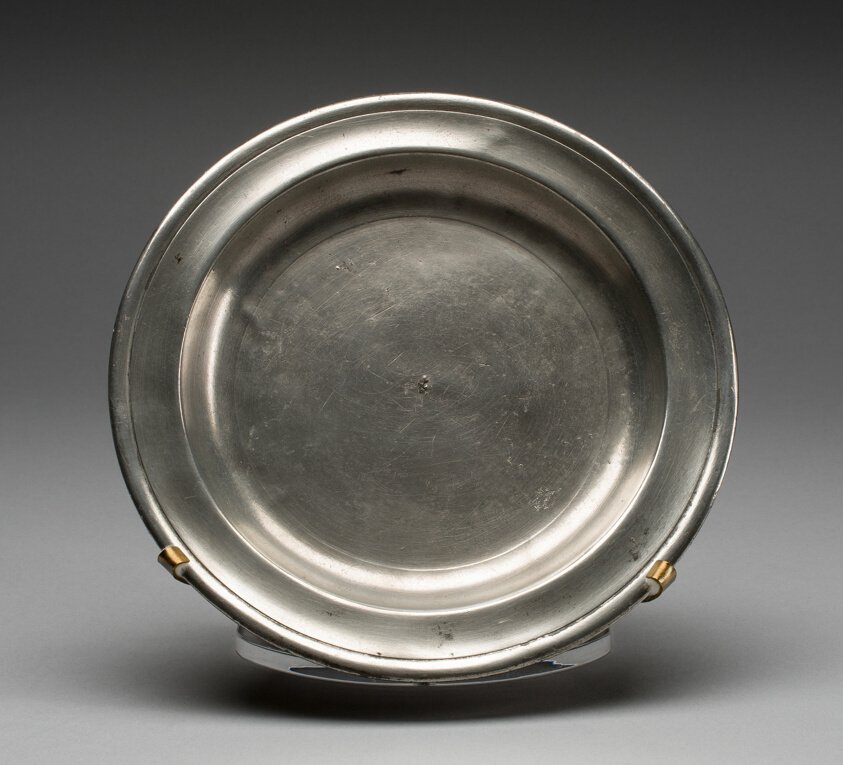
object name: Decorative Arts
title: Plate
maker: Boardman and Company; American, 1825–27; New York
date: 1825–27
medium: Pewter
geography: New York City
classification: plate (general, dish); dish (vessel); ceramics; american decorative arts; american arts; decorative arts